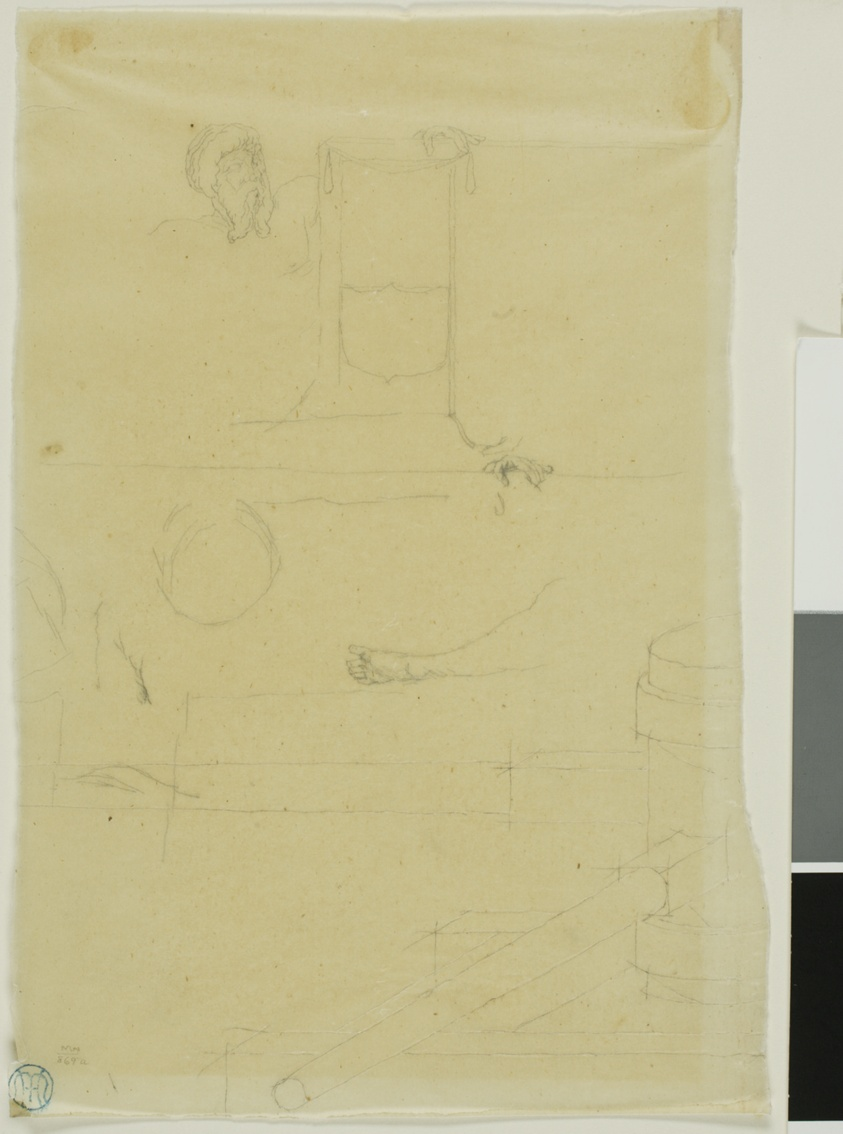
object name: Drawing and Watercolor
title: Study for San Francisco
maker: Charles Meryon (French, 1821-1868)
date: 1855–56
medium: Graphite on cream wove tracing paper (discolored to tan), tipped on ivory wove card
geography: France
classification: graphite; drawings (visual works); prints and drawing